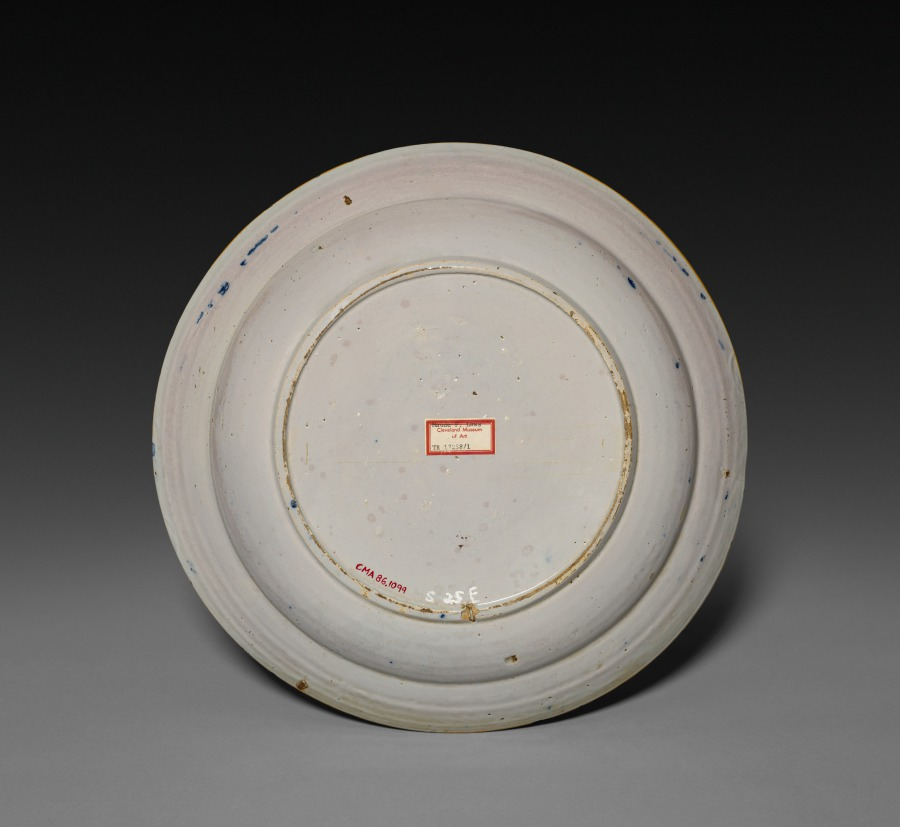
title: Delftware Plate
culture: Netherlands, Holland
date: c. 1750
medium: glazed ceramic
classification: Ceramic